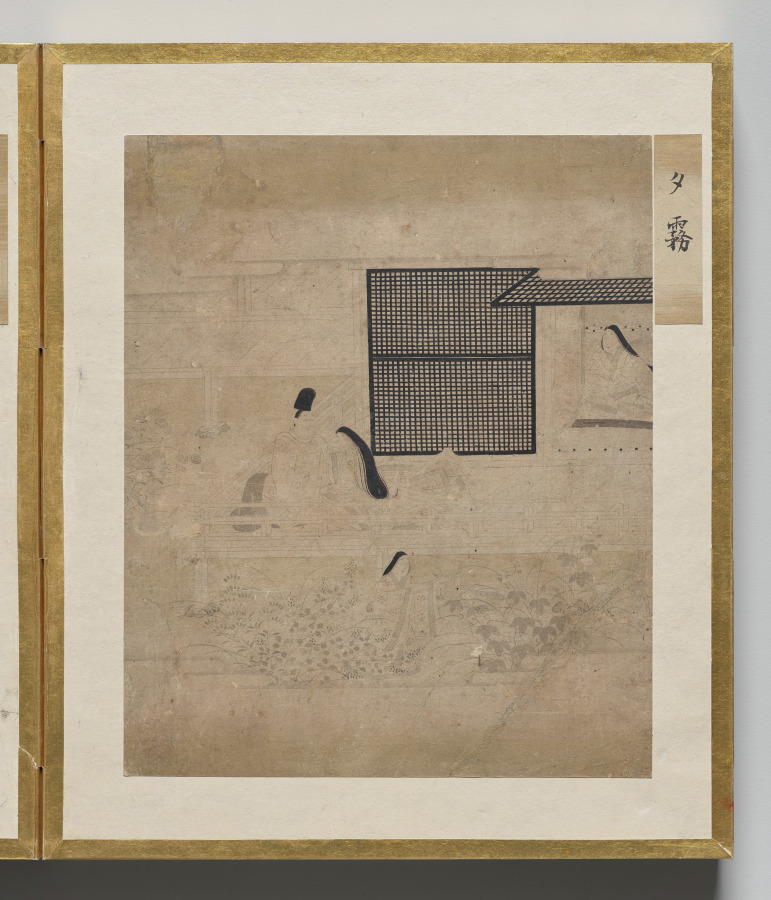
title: Evening Mist from Album of Illustrations for the Tale of Genji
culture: Japan, Edo period (1615–1868)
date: 1600s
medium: painting in an accordion-style album; ink, light color, and gold on paper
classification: Bound Volume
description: This album contains illustrations for the classic literary work the Tale of Genji, authored in the 1000s by Murasaki Shikibu, an aristocrat of the Heian period (794–1185) court. The scenes are painted in the “white drawing” (hakubyō) mode, in which a fine ink line is used to depict figures and spaces with great subtlety, punctuated only occasionally by traces of red pigment for a character’s lips, a detail of a garment, or a decorative element. These two scenes illustrate episodes from the chapters “Thin Veil of Cloud” (Usugumo) and “Barrier Gate” (Sekiya).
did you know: The illustrations are identified by chapter title in cartouches to the upper right of the paintings.